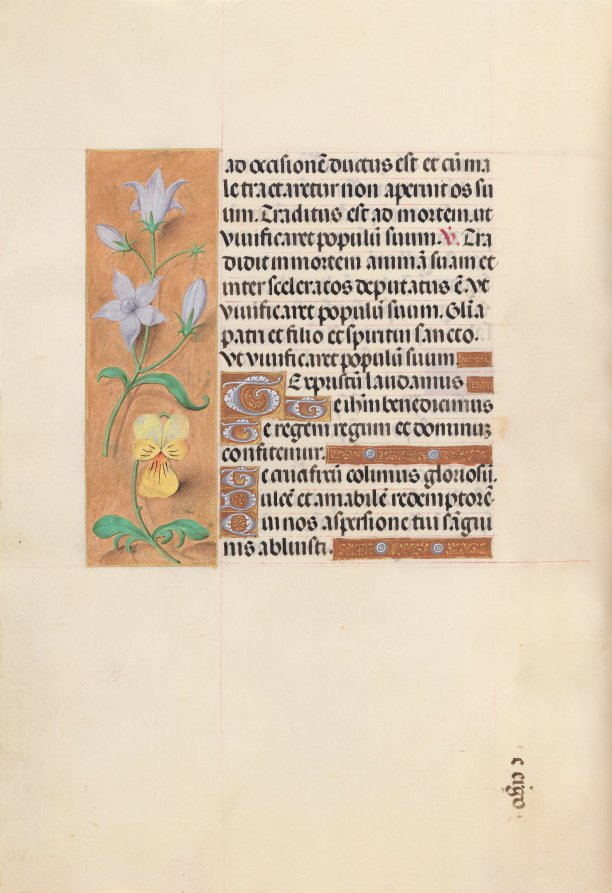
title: Hours of Queen Isabella the Catholic, Queen of Spain: Fol. 55v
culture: Flanders, Ghent and Bruges, late 15th century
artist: Master of the First Prayerbook of Maximillian (Flemish, c. 1444–1519)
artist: and Associates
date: c. 1500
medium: ink, tempera, and gold on vellum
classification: Bound Volume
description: This manuscript was illuminated by a circle of at least five highly organized manuscript painters active in the Flemish cities of Ghent and Bruges. The principal illuminator was Alexander Bening, who painted the majority of the book's miniatures. Manuscripts produced by this circle of artists are renowned for the decoration of their borders, which typically feature a rich variety of realistically-painted flowers, birds, and butterflies. This prayer book, called a book of hours, was intended not for a cleric, but for the private devotions of a lay person-in this case, Isabella the Catholic, Queen of Spain (1451-1504). Isabella's coat of arms embellishes the book's frontispiece. It is unlikely that the book was commissioned by the Queen herself; rather, she probably received it as a diplomatic gift from someone courting her patronage, perhaps Cardinal Francisco Jimenez de Cisneros. A Franciscan friar, Jimenez was dependent upon Isabella for his advancement, first to the post of Queen's confessor in 1492, and then to Archbishop of Toledo in 1495.